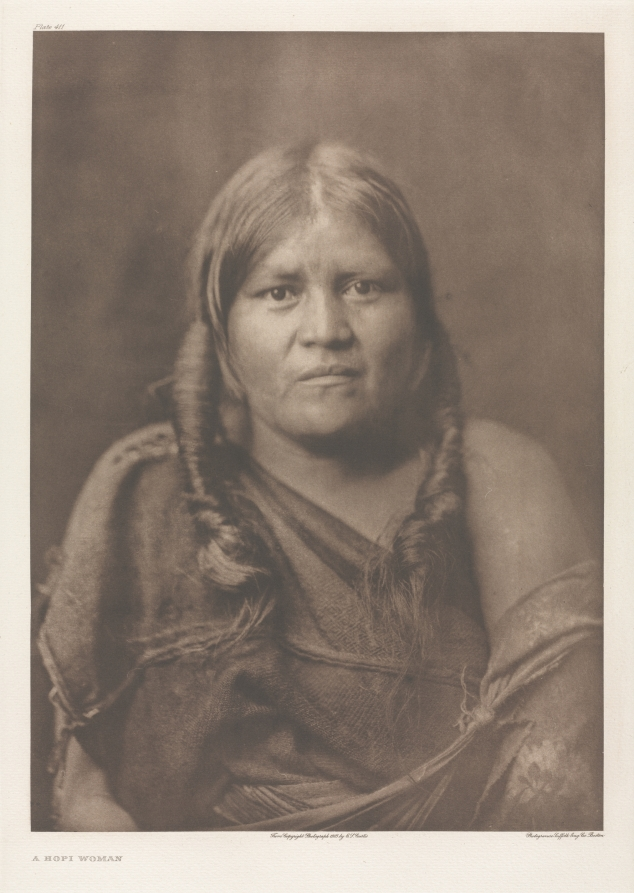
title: Portfolio XII, Plate 411: A Hopi Woman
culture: America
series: The North American Indian: being a series of Portfolios picturing and describing the Indians of the United States, the Dominion of Canada, and Alaska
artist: Edward S. Curtis (American, 1868–1952)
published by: The University Press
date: 1905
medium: photogravure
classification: Portfolio